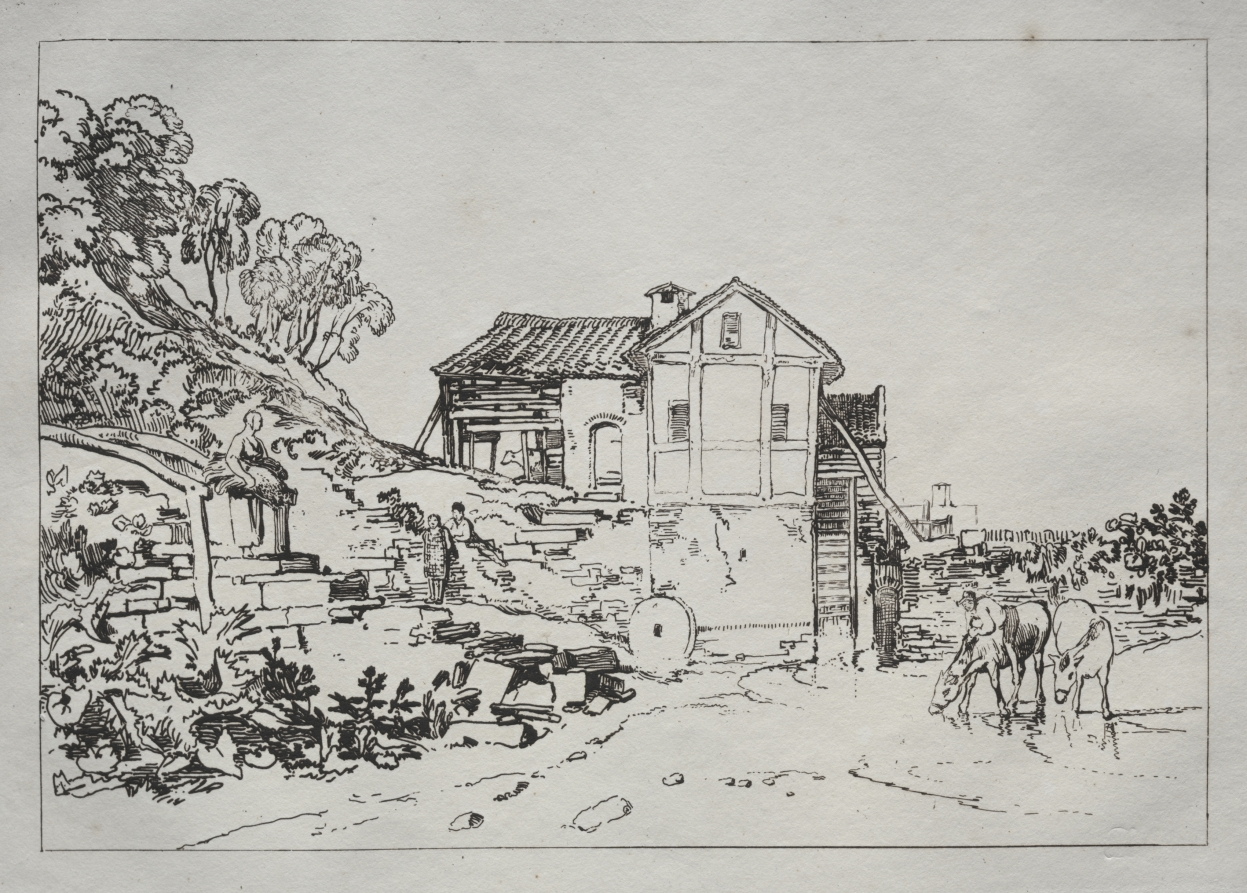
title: Liber Studiorum: Watermill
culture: England, 19th century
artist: Joseph Mallord William Turner (British, 1775–1851)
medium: etching and mezzotint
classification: Print